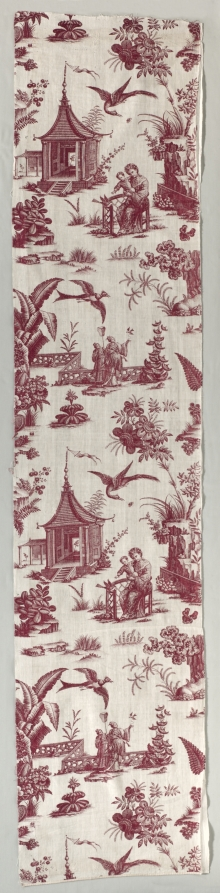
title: Copperplate-Printed Cotton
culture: England, Chambers, 18th century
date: 1700s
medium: copperplate printed cotton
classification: Textile